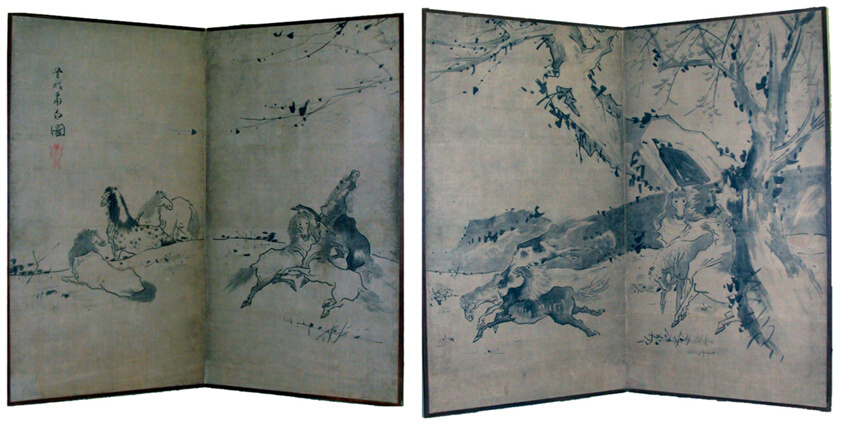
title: Wild Horses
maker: Soga Shōhaku 曾我 蕭白; Japanese, 1730-1781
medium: Pair of two-panel screens; ink on paper.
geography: Japan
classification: screen; painting; asian art